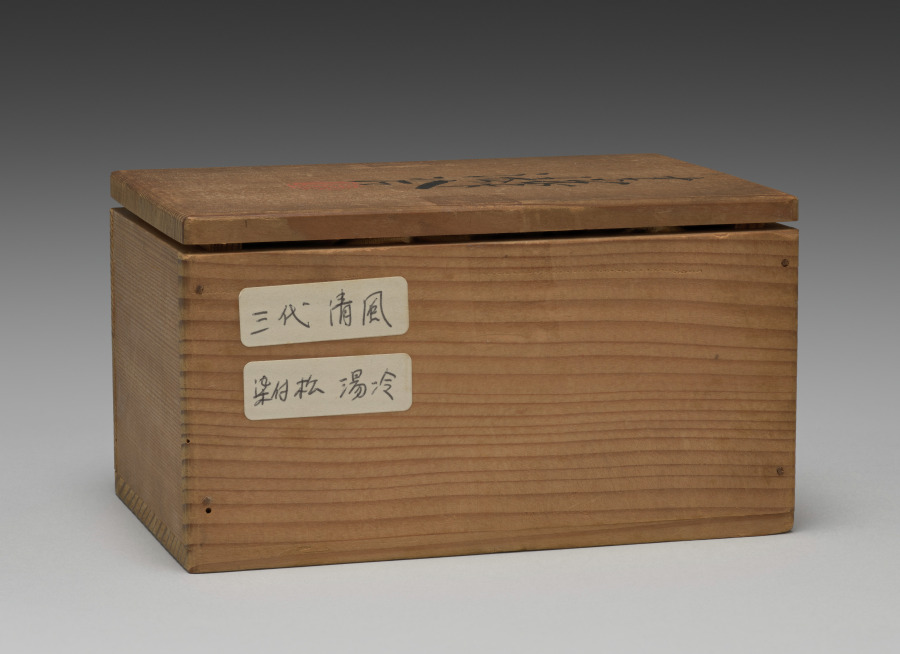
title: Water Cooler with Pines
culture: Japan, Meiji period (1868–1912)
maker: Seifū Yohei III (Japanese, 1851–1914)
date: 1893–1914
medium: Porcelain with underglaze blue and molded designs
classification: Ceramic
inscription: The center of the base contains an ovoid “Seifu” seal.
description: Hot water coolers, or yuzamashi, are essential components of sencha tea sets. Yuzamashi are used to cool boiled water to the ideal temperature for the type of tea to be brewed. The kidney-like shape of this one permits it to be cradled in one hand, following curvature of the palm, with the tips of the thumb and index finger each pressed against a nyoi staff-head-shaped applied form, perfectly placed to ensure a stable hold. Someone pinching the cooler in this way would have enough protection from the heat to maintain a steady grip but also sufficient contact along the base of thumb to assess the water temperature. On each of the cooler’s two longer sides, a pine tree in grass or sand is painted under the glaze in cobalt blue. The tree on one side has two main roots and two large branches, while that on the other has a single, thick, curved line from root to tip with racks of needles spreading across the width of the sky. A blue oval is traced along the footring, and the center of the base contains an ovoid “Seifu” seal.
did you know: Evergreen, pines have associations with eternal youth and longevity.